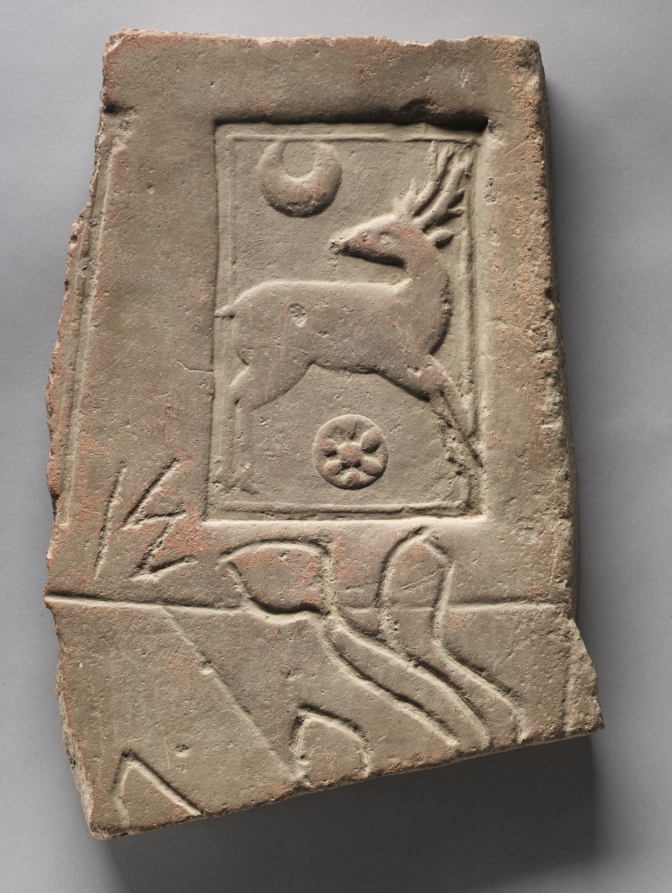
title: Deer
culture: India, Kashmir, Harwan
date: 300s CE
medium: terracotta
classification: Sculpture